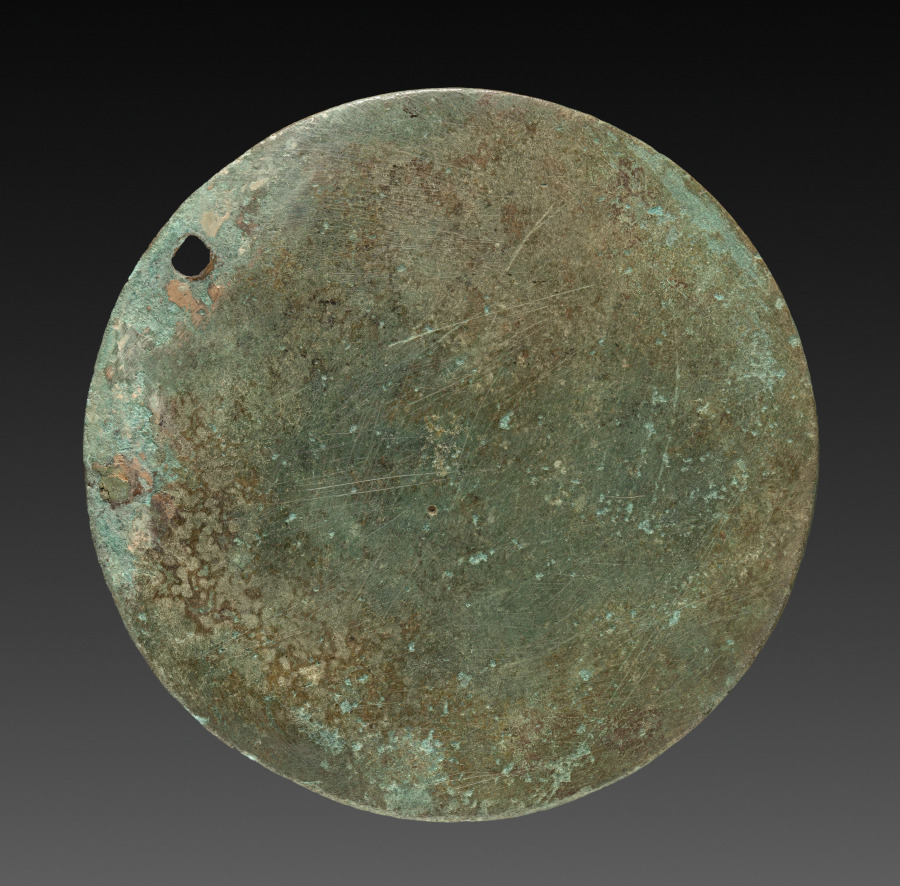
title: Mirror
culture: Japan, Kamakura period (1185–1333)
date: 1185–1333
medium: bronze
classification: Metalwork